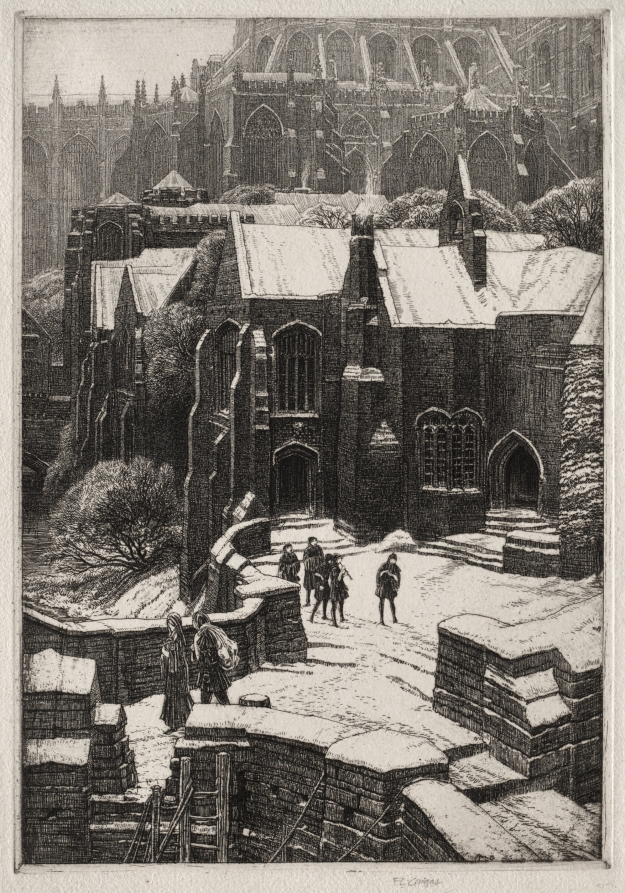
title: The Almonry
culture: England, 20th century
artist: Frederick Landseer Maur Griggs (British, 1876–1938)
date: 1925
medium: etching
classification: Print